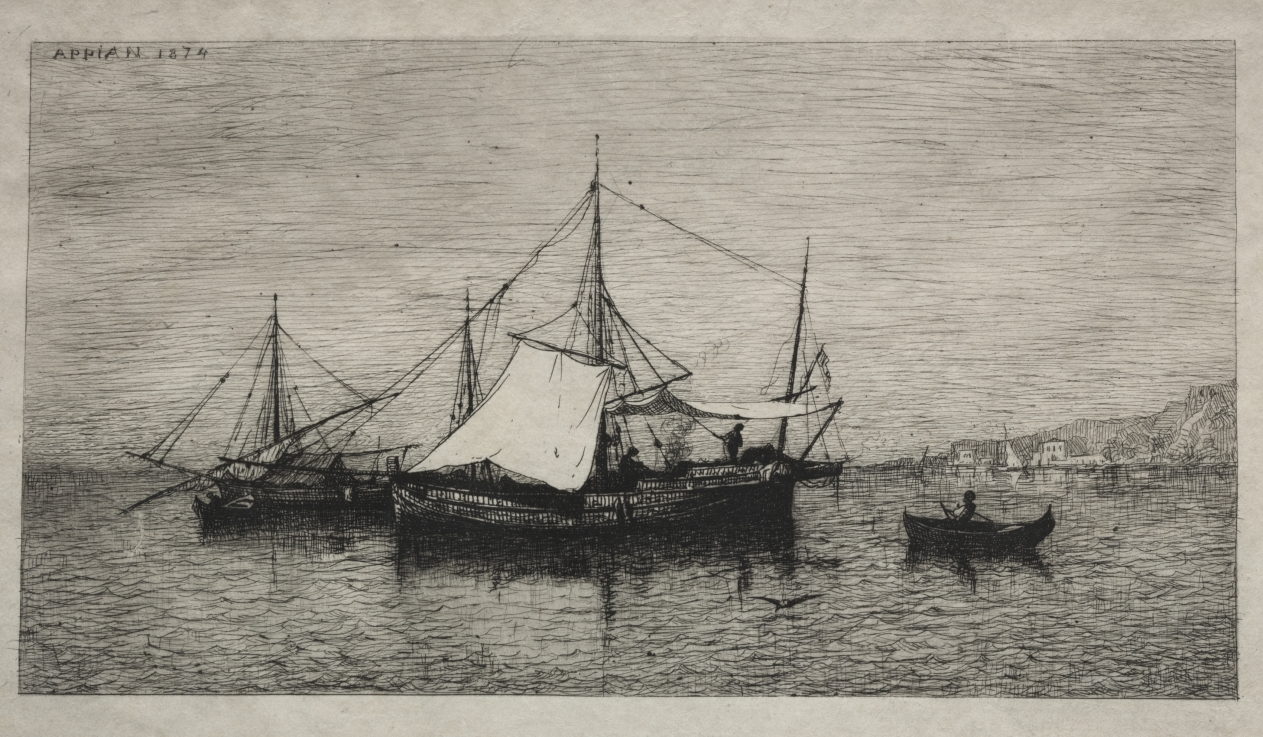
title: Boats of Cabotage (Coasts of Italy)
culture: France, 19th century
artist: Adolphe Appian (French, 1818–1898)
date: 1874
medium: etching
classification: Print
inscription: upper left, in plate: Appian 1874